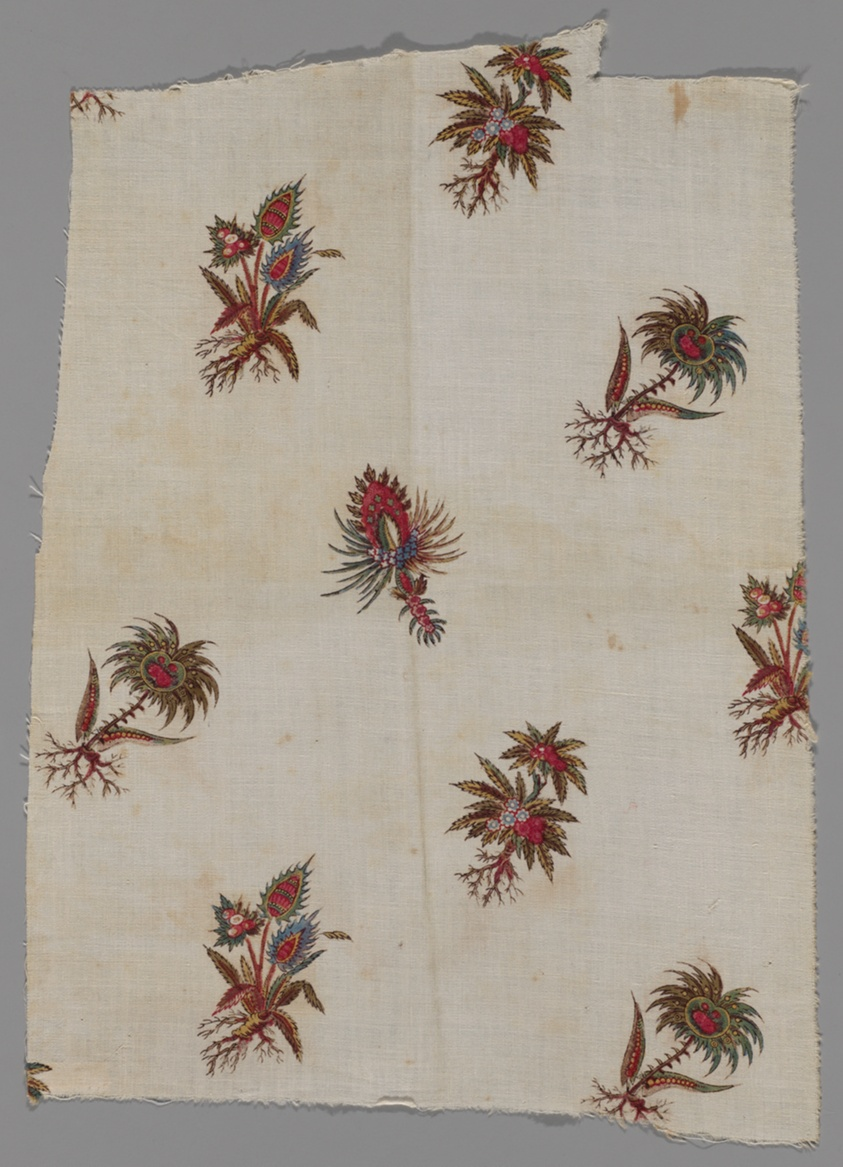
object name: Textile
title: Fragment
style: jouy-en-Josas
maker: France, probably Jouy-en-Josas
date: 1770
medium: Cotton, plain weave; block printed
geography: France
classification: textile; weaving - printed; weaving